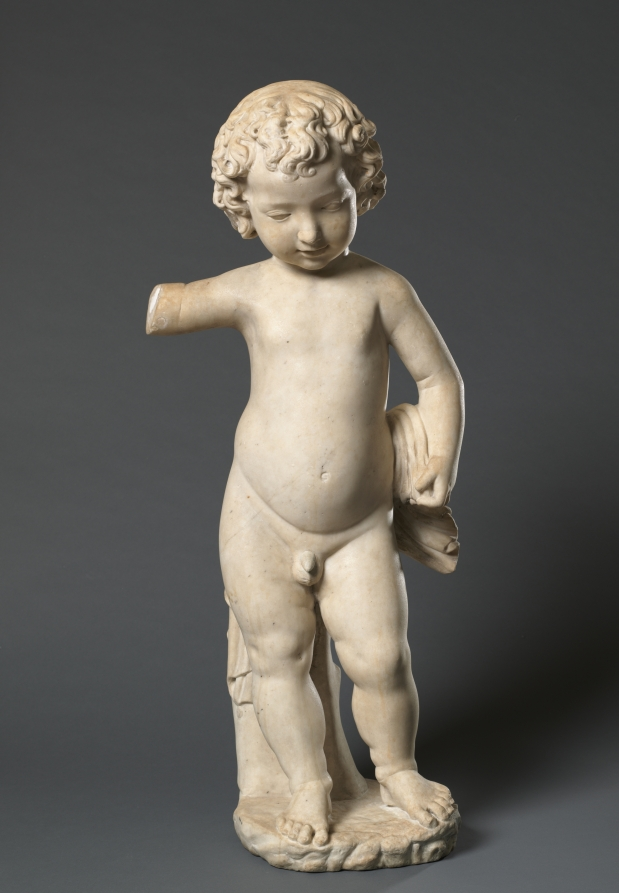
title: Christ Child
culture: Italy, Florence, 15th century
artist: attributed to Michele (di Luca) Marini (Italian)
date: c. 1490–1500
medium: marble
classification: Sculpture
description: This sculpture is an enlarged version of Desiderio da Settignano's figure of about 1460 at the top of his tabernacle in the Church of San Lorenzo in Florence. There are many replicas of Desiderio's work. This example is an especially fine one, undoubtedly intended for the interior of a church.